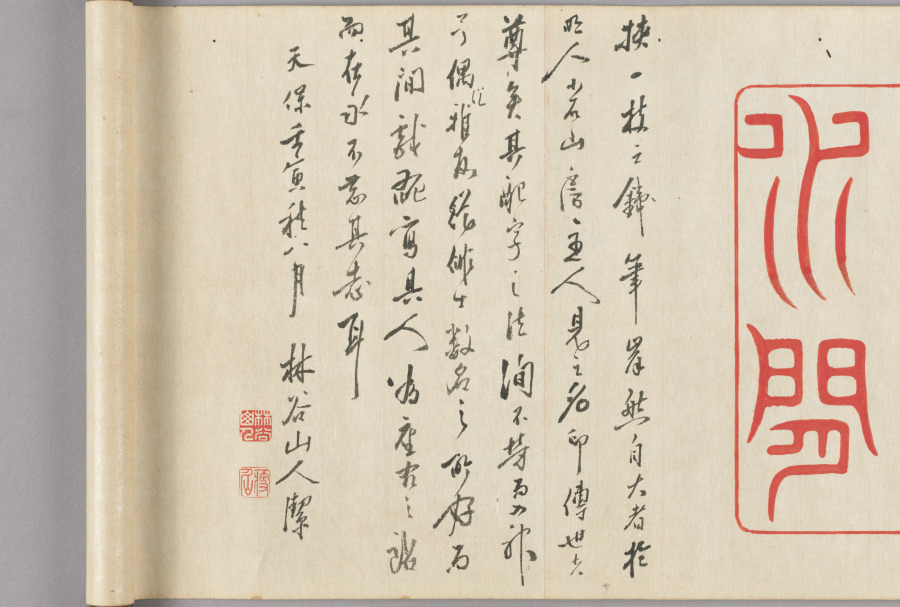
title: Chinese Seals and Poets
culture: Japan, Edo period (1615–1868)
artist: Hosokawa Rinkoku (Japanese, 1779–1843)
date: 1842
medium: handscroll; ink and color on paper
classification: Painting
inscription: Eight seal impressions are painted in red and alternate with sketchily painted figures. Artist's colophon at end of scroll.